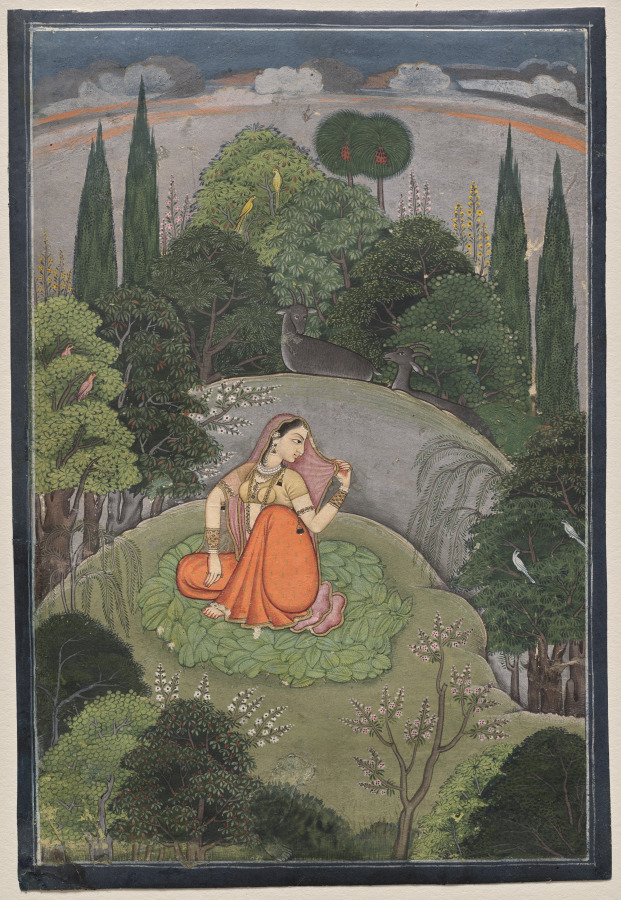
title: The Heroine Who Waits Anxiously for Her Absent Lover: Utka Nayika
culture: Northern India, Pahari kingdoms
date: c. 1760–65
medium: Gum tempera and gold on paper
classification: Painting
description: In the hilly and verdant landscape all around her, birds and animals are all in pairs—even many of the trees have doubles—but she remains alone, waiting on a bed of leaves for her lover to arrive. She has no way of knowing when he will come, like the devotee has no way to know when god will arrive and bring salvation and bliss.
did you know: The wildlife has been depicted in pairs to highlight the nayika’s loneliness.